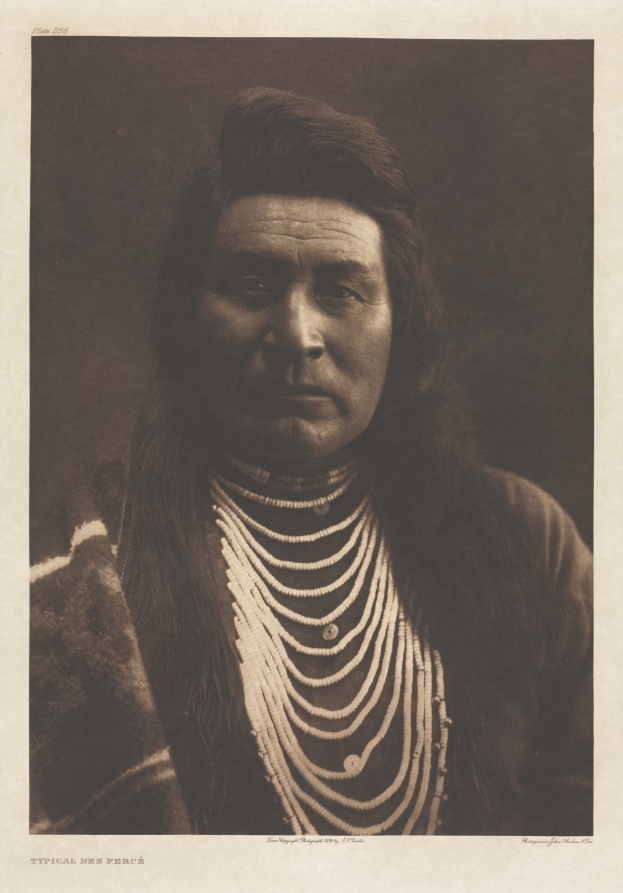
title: Portfolio VIII, Plate 258: Typical Nez Percé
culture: America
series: The North American Indian: being a series of Portfolios picturing and describing the Indians of the United States, the Dominion of Canada, and Alaska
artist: Edward S. Curtis (American, 1868–1952)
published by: The University Press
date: 1899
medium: photogravure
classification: Portfolio